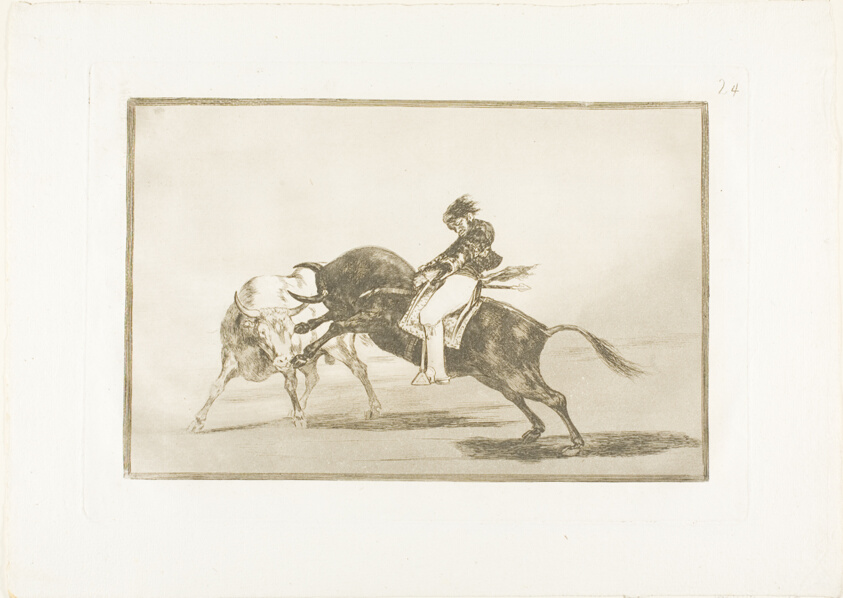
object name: Print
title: The Same Ceballos, Mounted on Another Bull, Breaks Short Spears in the Ring at Madrid, plate 24 from The Art of Bullfighting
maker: Francisco José de Goya y Lucientes (Spanish, 1746-1828)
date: 1814/16, published 1816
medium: Etching, burnished aquatint, drypoint and burin on ivory laid paper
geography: Spain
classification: etching; print; prints and drawing